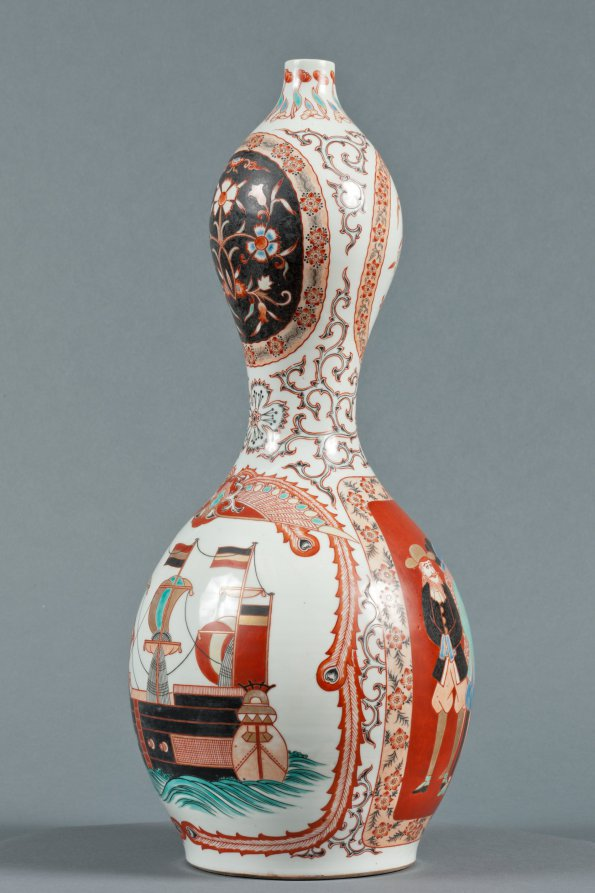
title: Bottle with Western Ships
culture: Japan, Edo period (1615–1868)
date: c. 1800–1868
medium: Porcelain with decoration in colored enamels and underglaze blue, overglaze enamels, and gold (Hizen ware, Arita type)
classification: Ceramic